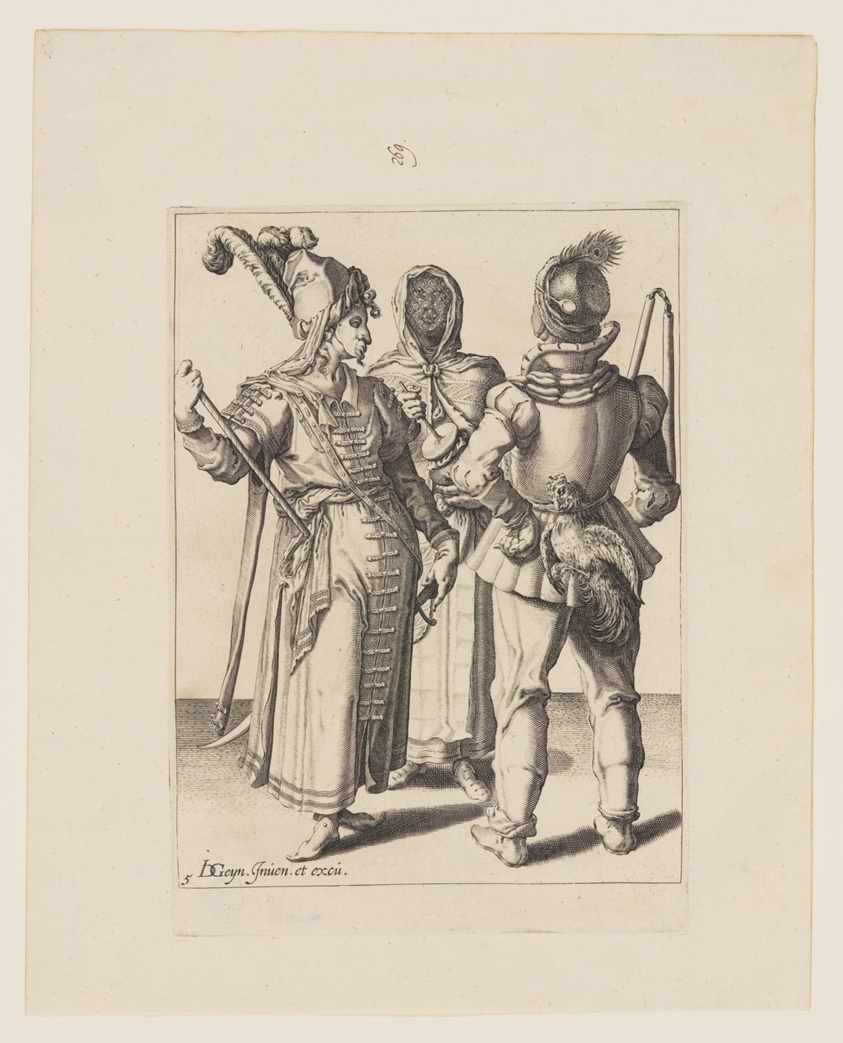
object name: Print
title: A Grandee in Eastern Dress, a Man with a Cock attached to his Belt and a Veiled Woman Playing the Rumbling-Pot, from The Masquerades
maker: Jacques de Gheyn II; Dutch, 1565–1629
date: 1595-96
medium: Engraving on ivory laid paper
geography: Netherlands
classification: engraving; paper; print; prints and drawing